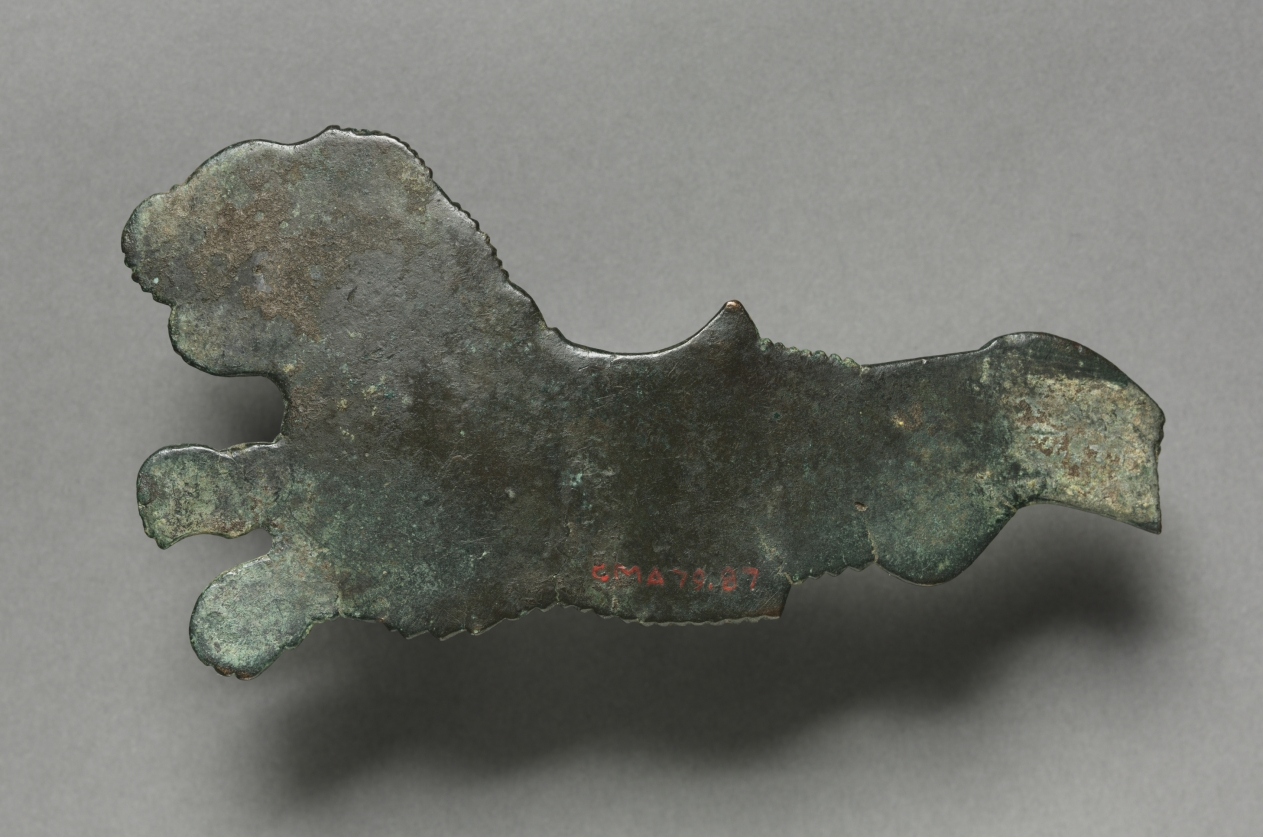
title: Hippocampus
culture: Thrace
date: 400–300 BCE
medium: bronze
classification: Sculpture